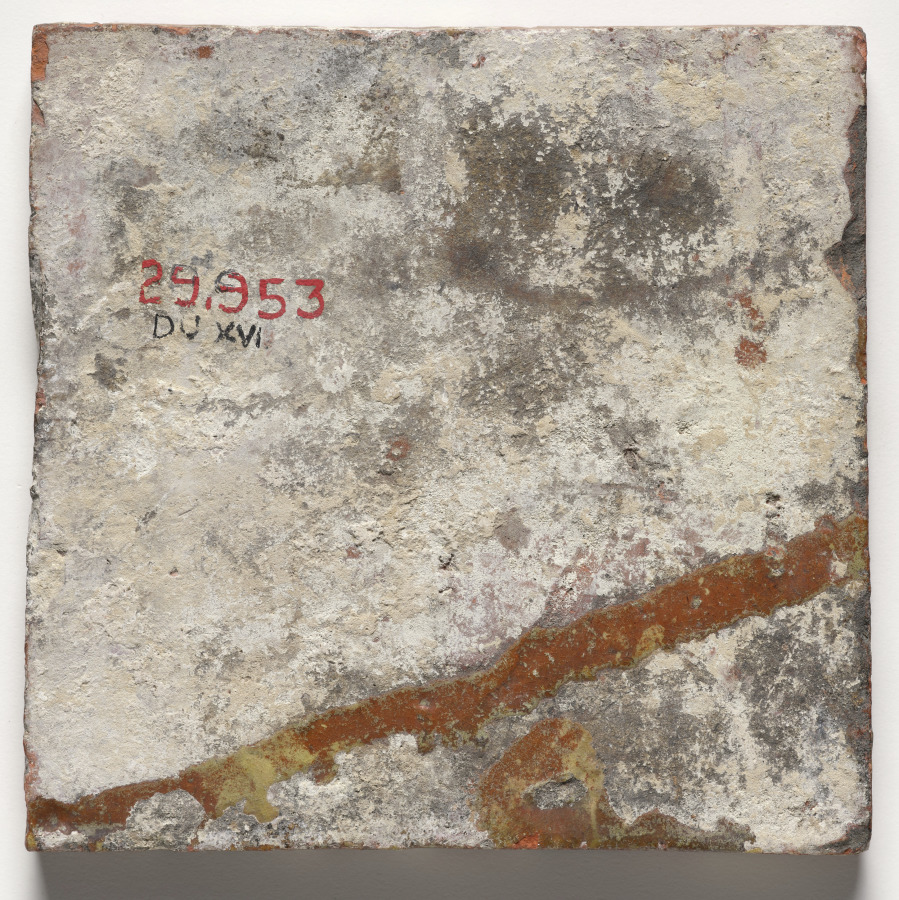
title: Tile- Brown with Yellow Central Motif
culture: Netherlands, Holland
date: c. 1500s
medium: glazed ceramic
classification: Ceramic